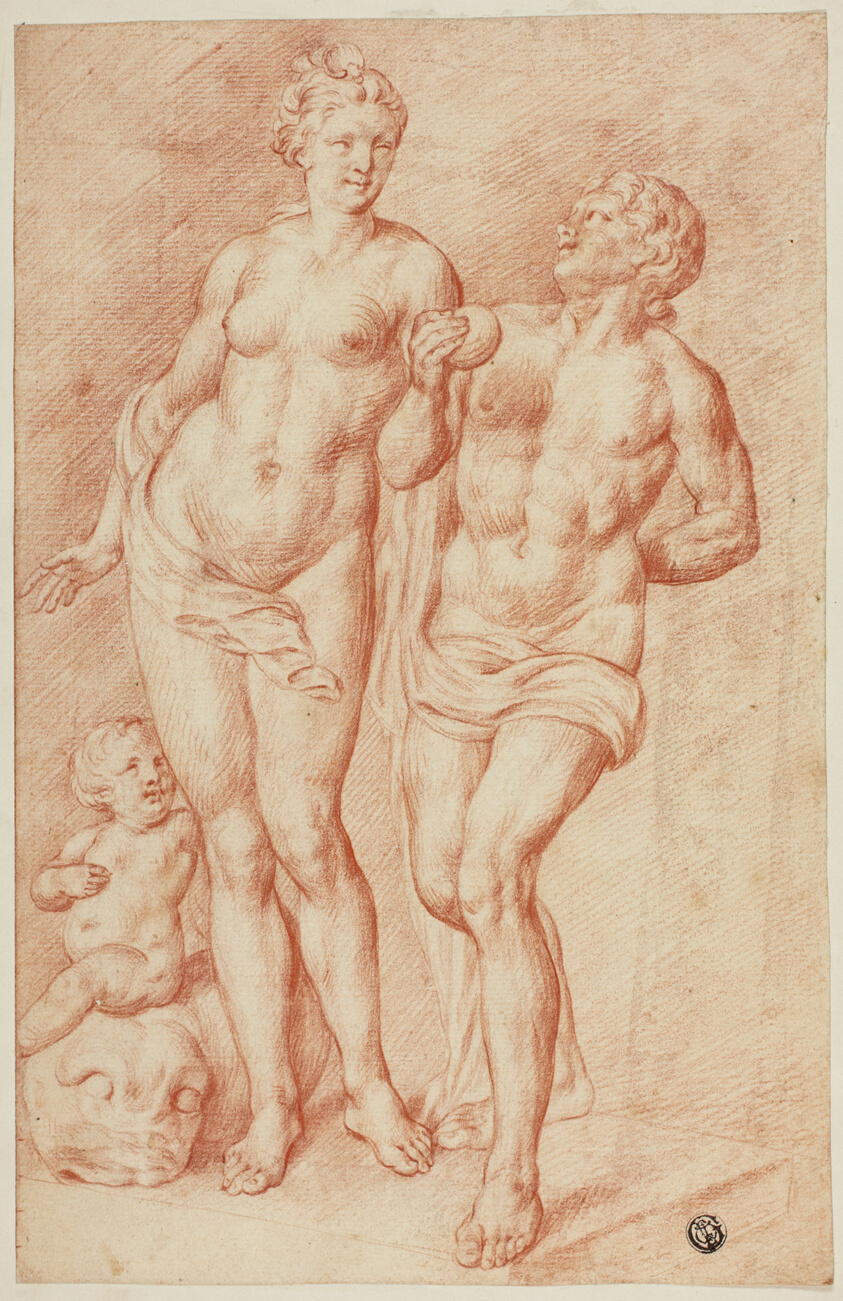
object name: Drawing and Watercolor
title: Venus and Paris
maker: Attributed to Pietro Dandini; Italian, 1646-1712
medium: Red chalk on ivory laid paper, laid down on cream wove card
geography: Italy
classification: chalk; drawings (visual works); prints and drawing